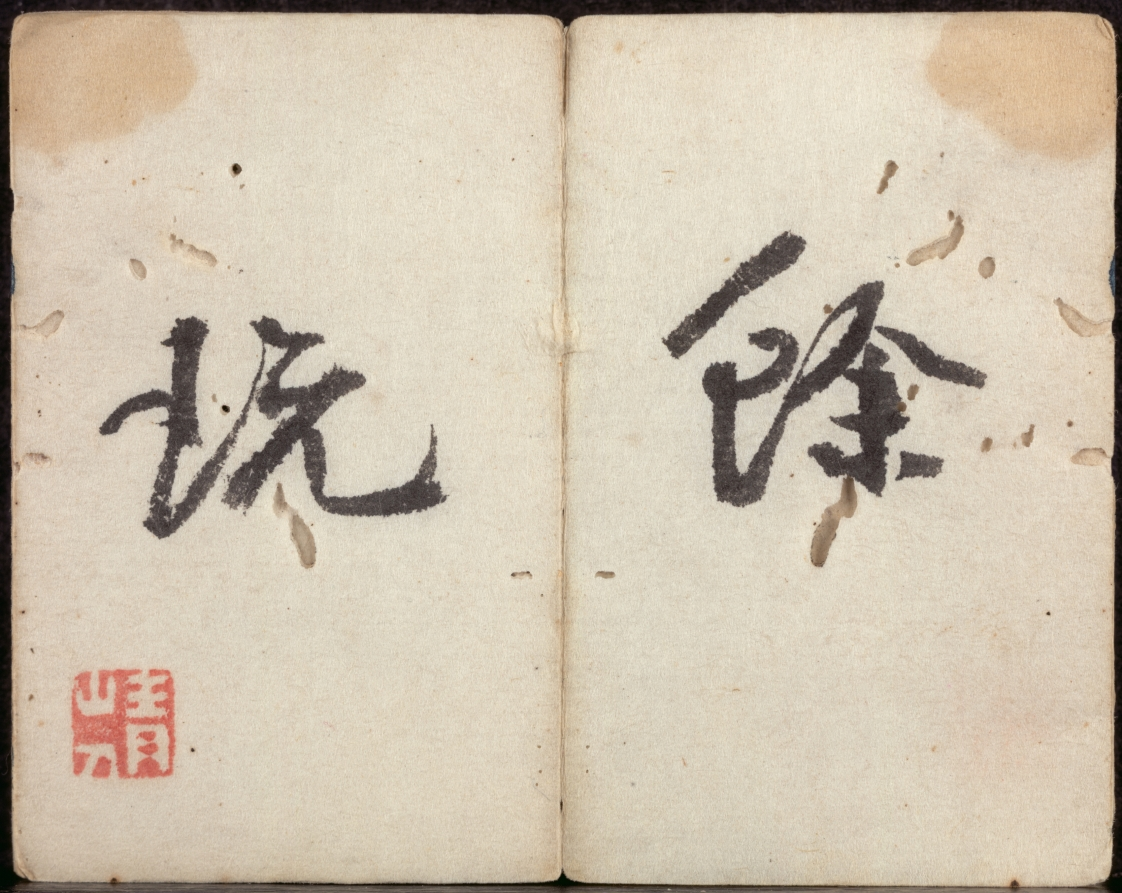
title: Miniature Album with Figures and Landscape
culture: China, Qing dynasty (1644–1911), Qianlong reign (1736–95)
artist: Zeng Yandong (Chinese, c. 1751–1827)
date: 1822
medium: Album of twelve leaves, ink and color on paper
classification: Painting